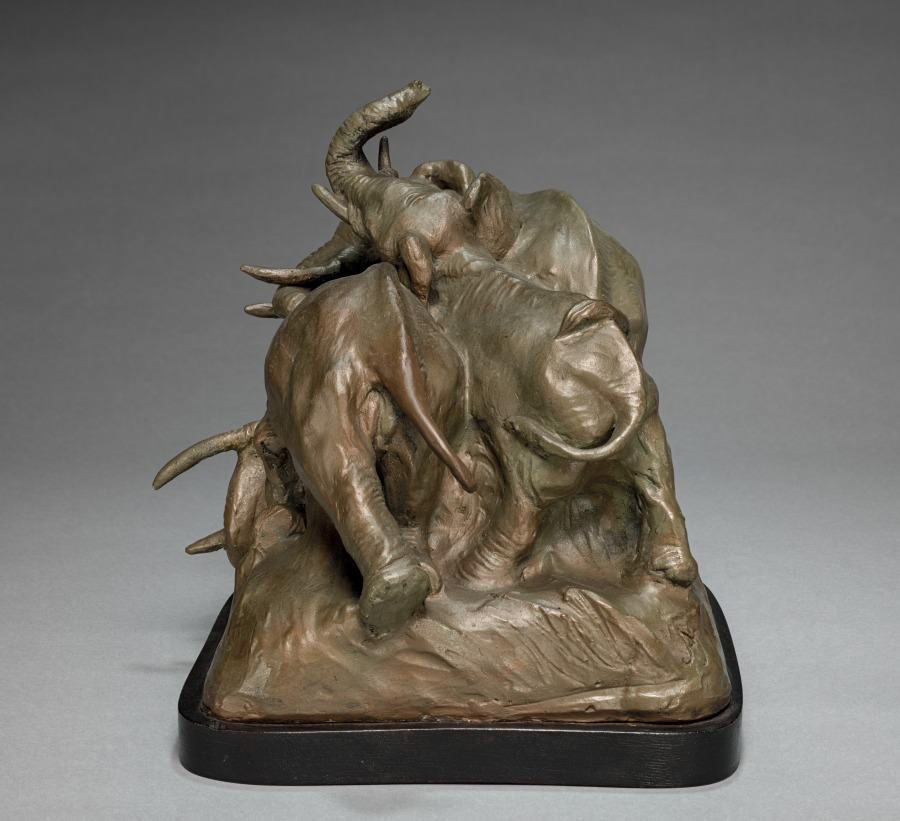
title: Mired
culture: America, Ohio, Cleveland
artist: John Ross Stewart (American, 1872–1954)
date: 1920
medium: plaster painted to resemble patinated green bronze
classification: Sculpture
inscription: incised in plaster near base: "Mired" and "JRS."